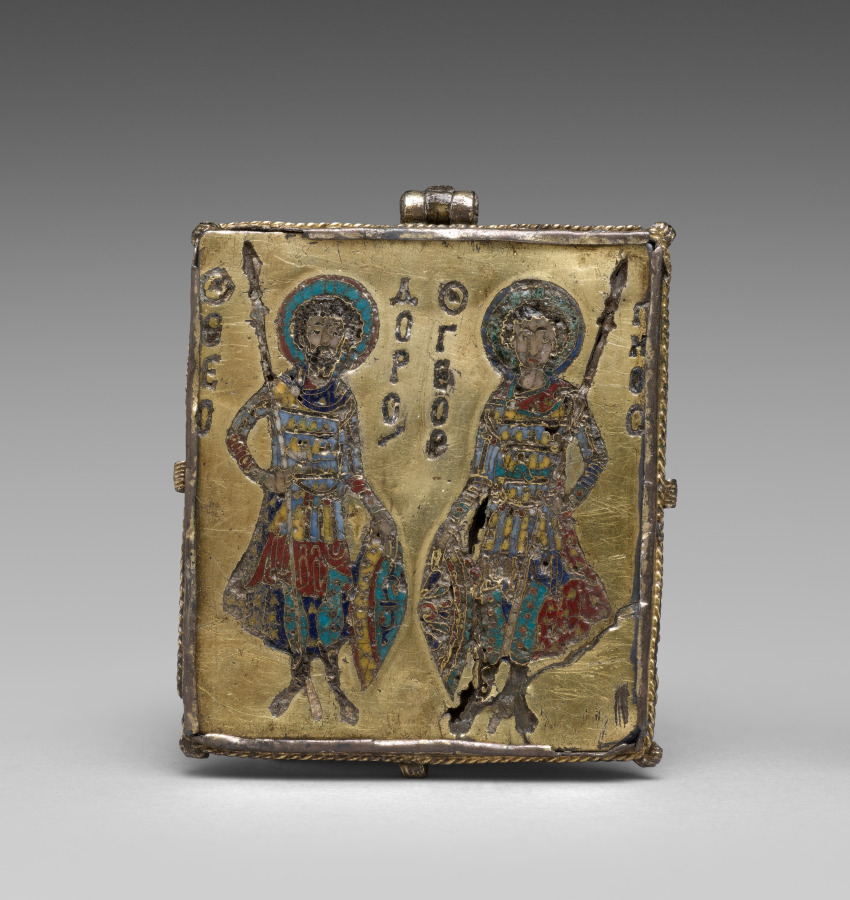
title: Enkolpion with the Crucifixion (front) and Saints Theodore and George (back)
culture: Byzantium, Constantinople, Byzantine period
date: 1080–1120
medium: silver gilt and cloisonné enamel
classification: Metalwork